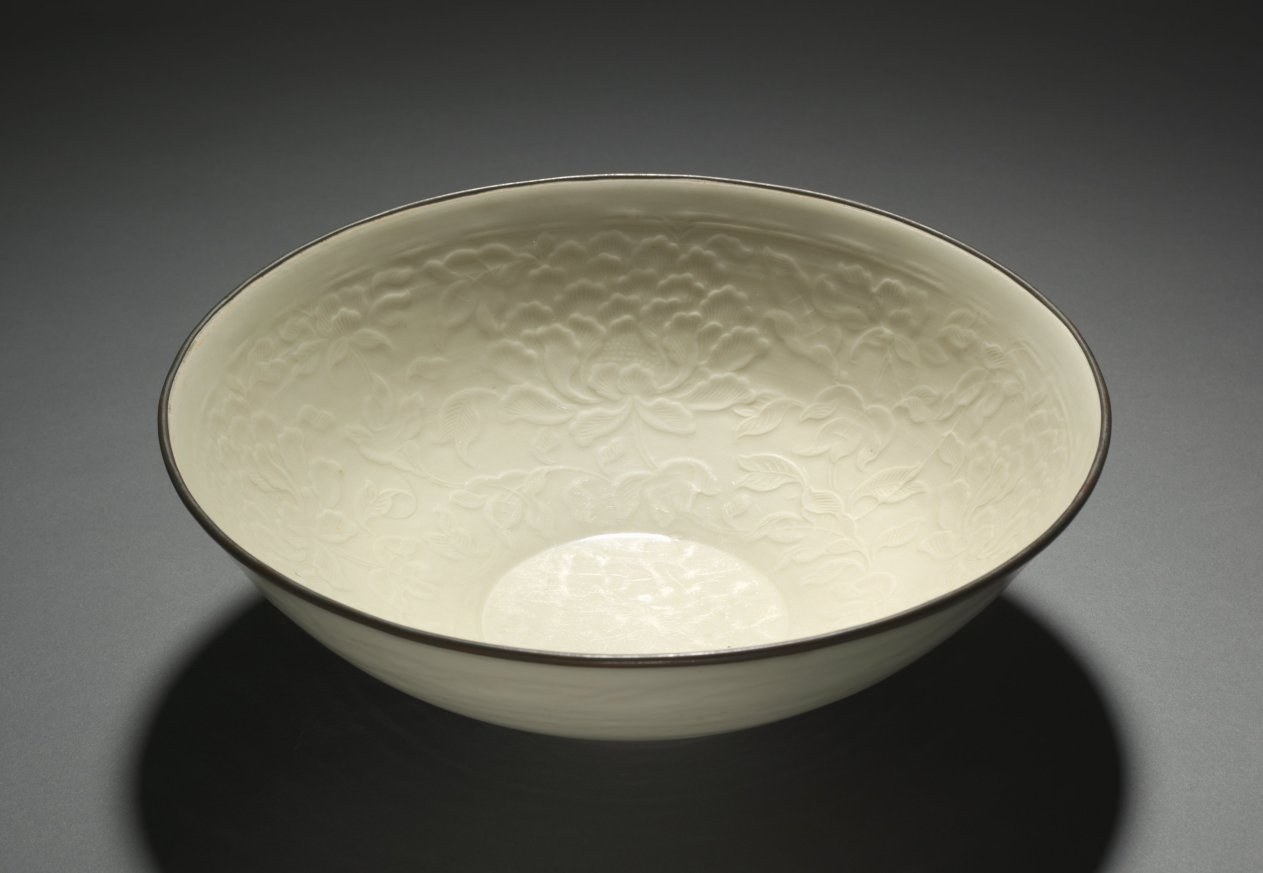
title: Large Bowl with Peony Scrolls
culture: China, Hebei province, Quyang, Jin dynasty (1115-1234)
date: 1100s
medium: cream-glazed porcelain with molded design and copper-bound mouth rim, Ding ware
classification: Ceramic